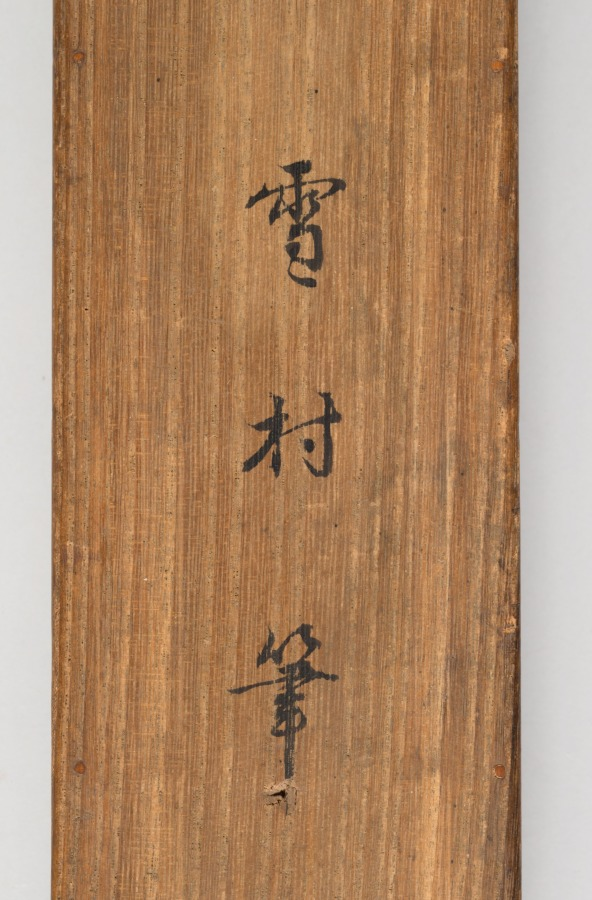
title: Mandarin Duck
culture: Japan, Muromachi period (1392–1573)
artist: Sesson Shūkei (Japanese, c. 1492–c. 1577)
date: 1500s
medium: hanging scroll; ink on paper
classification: Painting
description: In this painting, the artist depicted a scene of a solitary duck floating by reeds in a subtle arrangement of dry and wet, light and dark ink tones which conveys the tranquility of the moment.